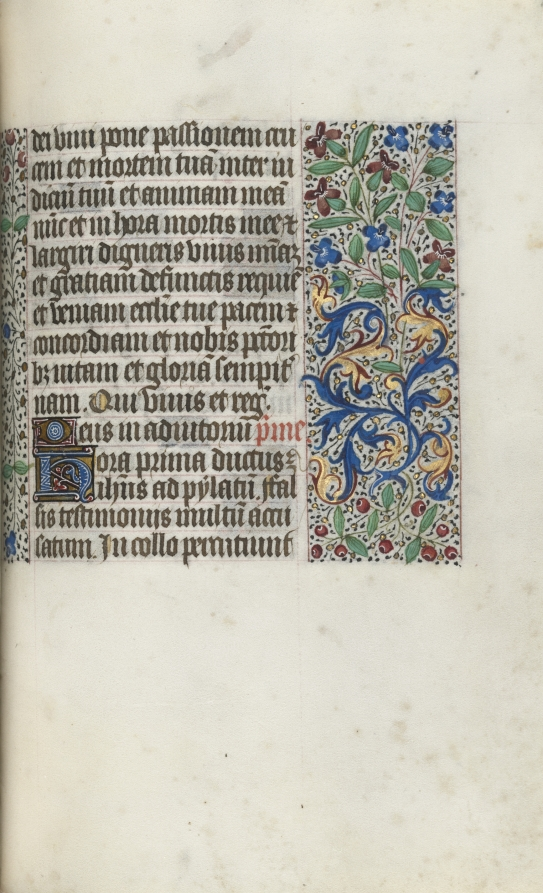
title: Book of Hours (Use of Rouen): fol. 97r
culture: France, Rouen, 15th century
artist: Master of the Geneva Latini (French, active Rouen, 1460–80)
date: c. 1470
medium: ink, tempera, and gold on vellum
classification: Bound Volume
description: In the late 1400s and early 1500s Rouen was an established and important center of book production. The city’s cathedral had a wealthy chapter that spent large sums of money to commission books and to maintain its extensive library. The stationers and booksellers would have likely been concentrated in or near the cathedral precinct. This artist, named after a manuscript now in Geneva, was Rouen’s principal illuminator during the second half of the 1400s.